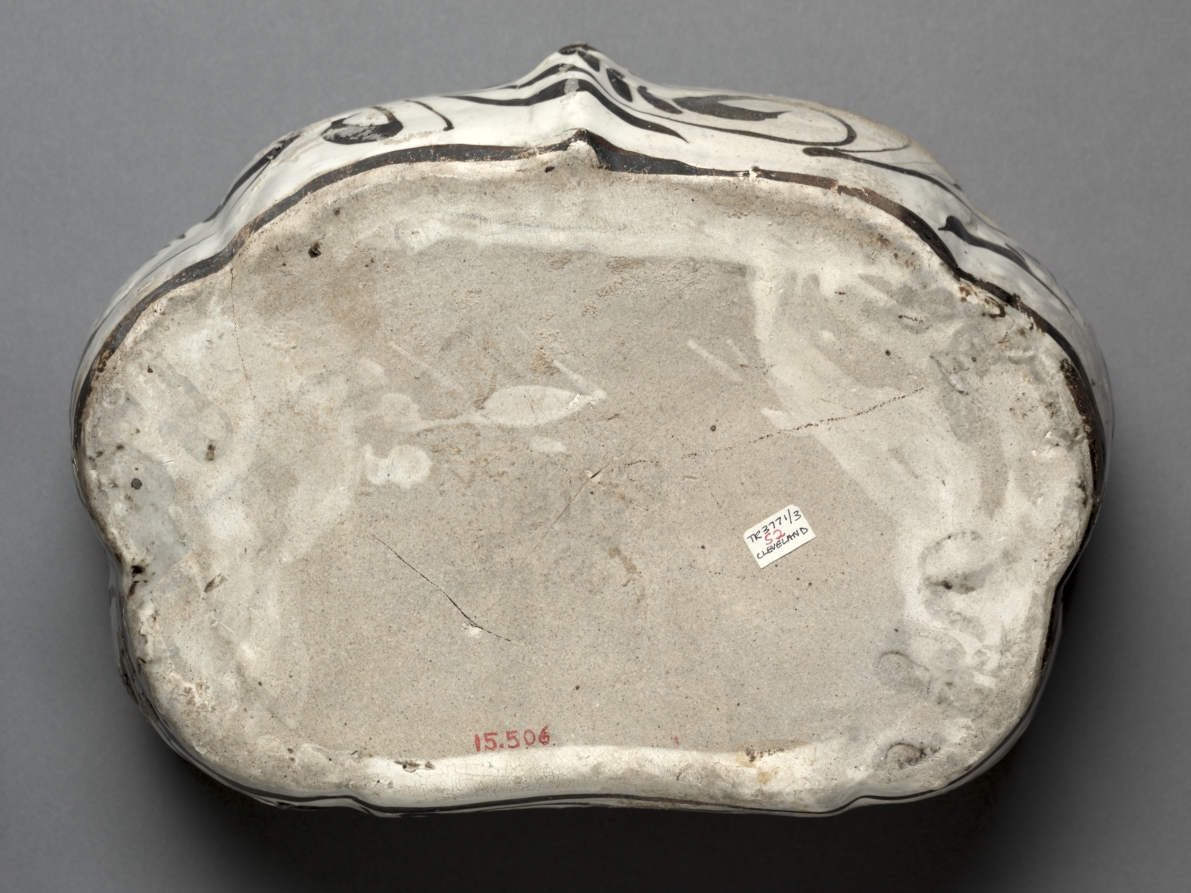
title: Pillow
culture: China, Song dynasty (960-1279) - Yuan dynasty (1271-1368)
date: 1100s–1200s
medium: Gray stoneware with underglaze painted decoration, Cizhou ware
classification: Ceramic